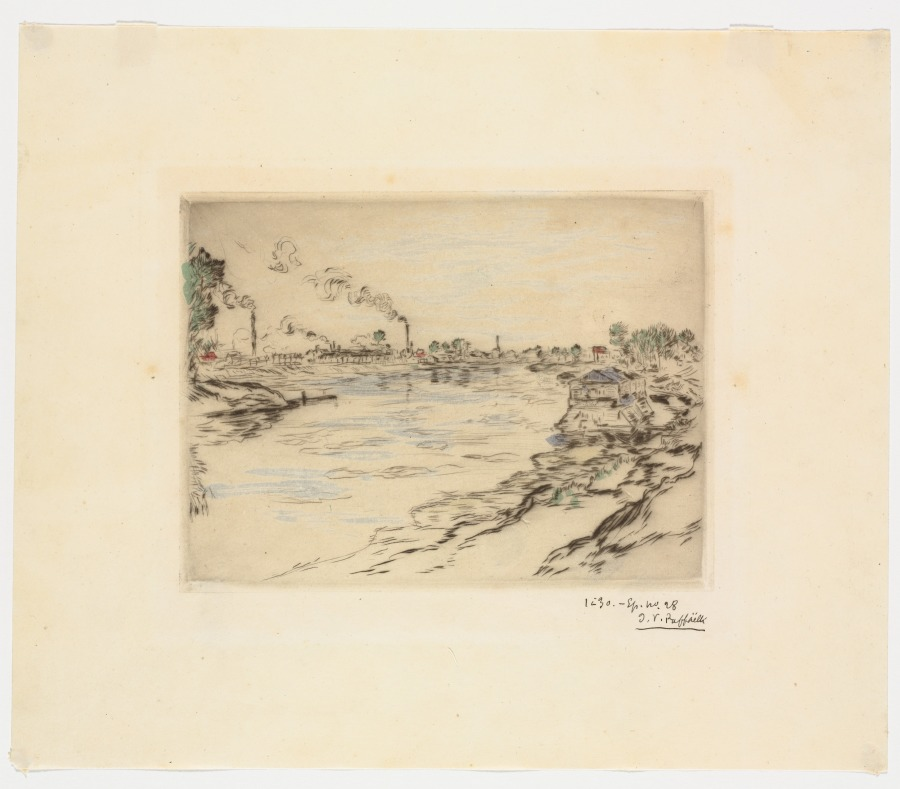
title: La Seine, à Asnières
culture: France, 19th century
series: Types de petits Gens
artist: Jean-François Raffaëlli (French, 1850–1924)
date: 1894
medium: etching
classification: Print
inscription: lower right margin, in pen and black ink: 1 à 30.-Ep. No. 28 / J. F. Raffaëlli